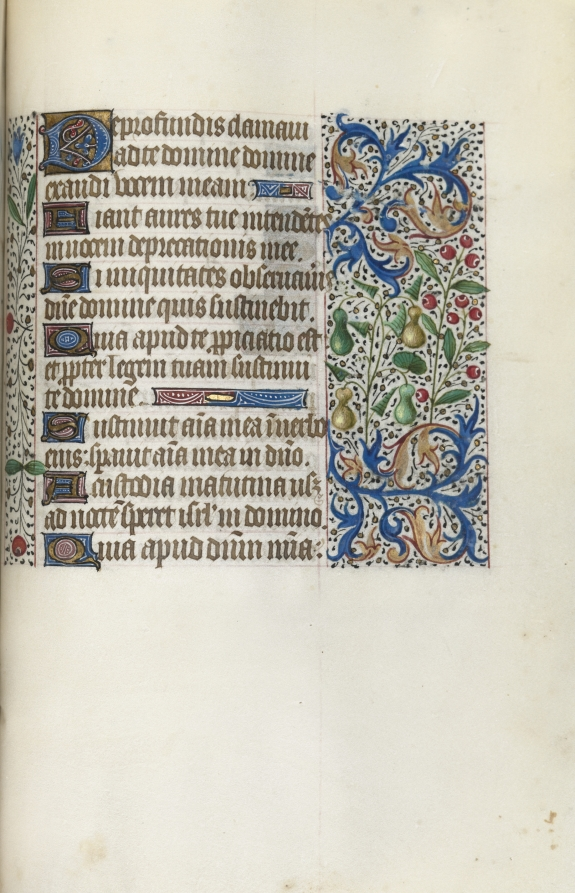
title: Book of Hours (Use of Rouen): fol. 145r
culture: France, Rouen, 15th century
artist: Master of the Geneva Latini (French, active Rouen, 1460–80)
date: c. 1470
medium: ink, tempera, and gold on vellum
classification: Bound Volume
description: In the late 1400s and early 1500s Rouen was an established and important center of book production. The city’s cathedral had a wealthy chapter that spent large sums of money to commission books and to maintain its extensive library. The stationers and booksellers would have likely been concentrated in or near the cathedral precinct. This artist, named after a manuscript now in Geneva, was Rouen’s principal illuminator during the second half of the 1400s.